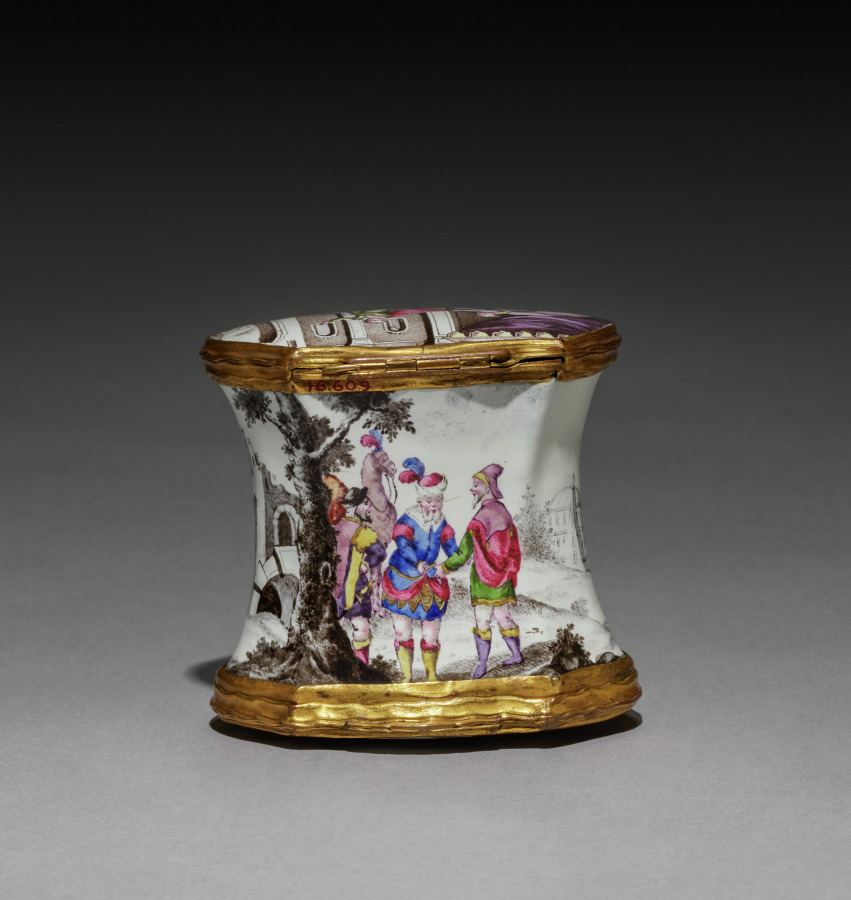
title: Box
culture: Germany, Augsburg, 18th century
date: c. 1730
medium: enamel on copper with metal mounts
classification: Miscellaneous